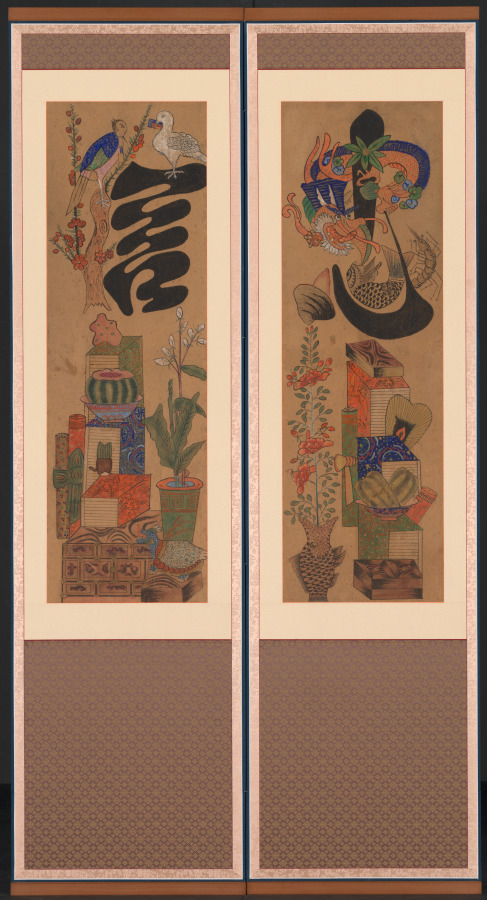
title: Munja-Chaekgeori Screen (Character-Books Screen)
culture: Korea, Joseon dynasty (1392–1910)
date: early 1900s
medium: Eight-panel folding screen, ink on paper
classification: Painting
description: This folding screen is a whimsical harmony of two different subjects: chaekgeori, or books and things; and munja, or characters. The lower section of each panel depicts the imagery of things, including books, decorative arts, and utilitarian objects. The upper portion of each panel bears a classical Chinese character. Read from far right to left, the eight characters refer to the values of Confucian teachings of the Joseon dynasty: filial piety, brotherly love, loyalty, trust, propriety, righteousness, modesty, and humility. While these two pictorial genres are harmoniously conjoined on the same picture plane, two sharply contrasting world views—urban consumerism and traditional Confucian ethics that despise materialism—compete with one another.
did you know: The eight Korean characters each mean filial piety, brotherly love, loyalty, trust, propriety, righteousness or justice, modesty or integrity, and humility or the feeling of shame.